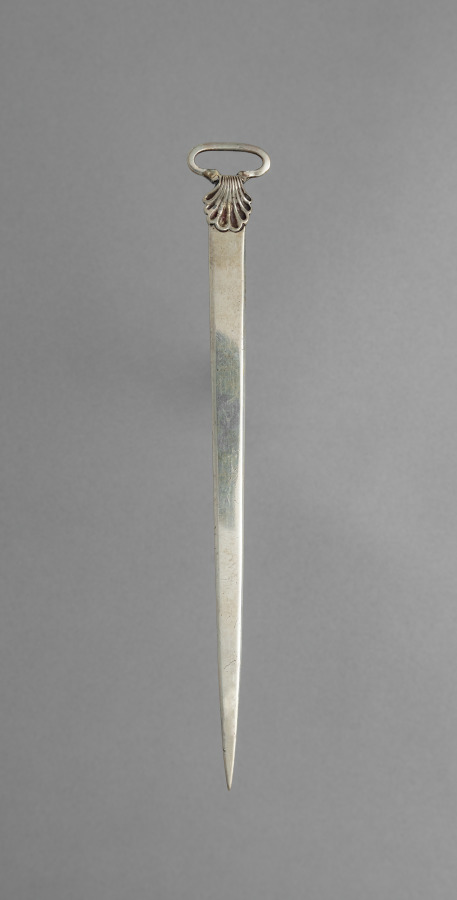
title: Skewer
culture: England, 18th century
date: 1700s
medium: silver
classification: Silver